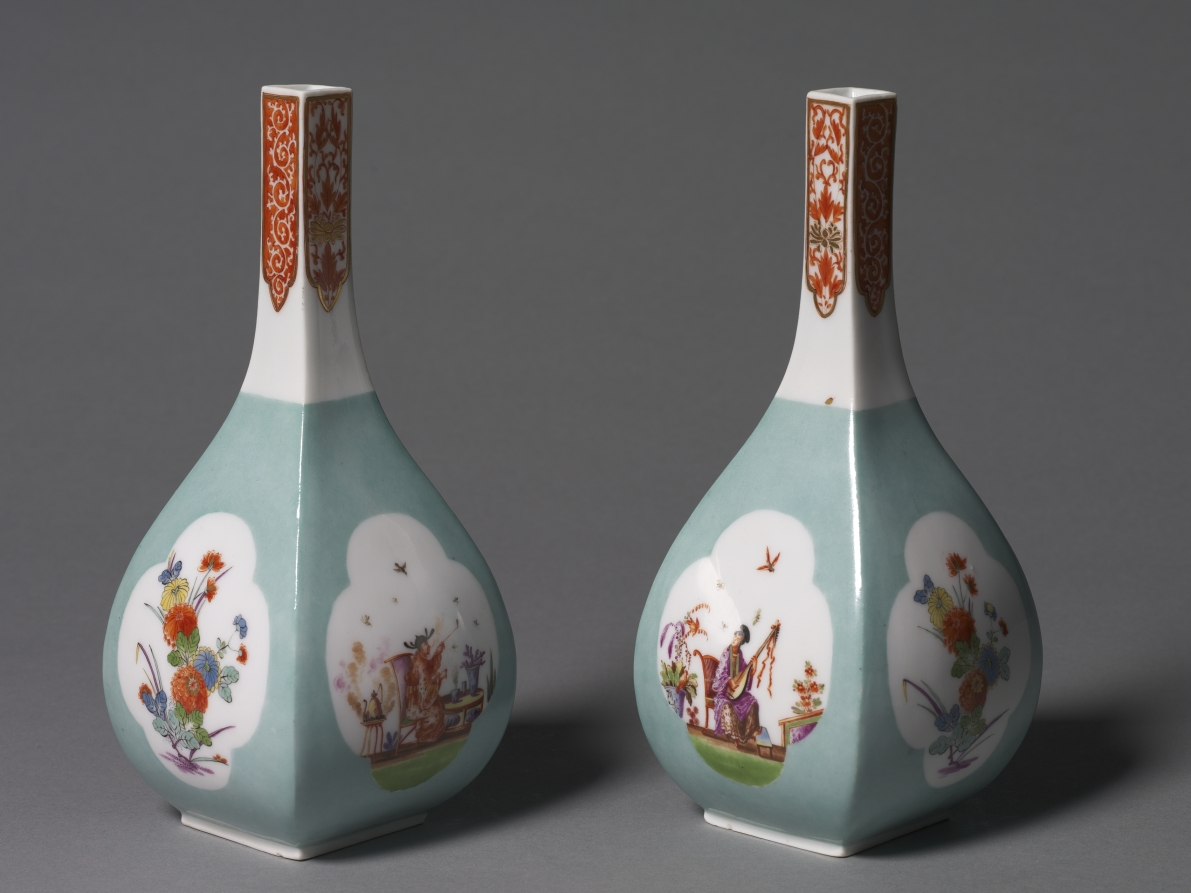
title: Saki Bottles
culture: Germany, Meissen, 18th century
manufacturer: Meissen Porcelain Factory (German, est. c. 1710)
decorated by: probably by Johann Gregor Herold (German, 1696–1775)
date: c. 1730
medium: porcelain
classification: Ceramic